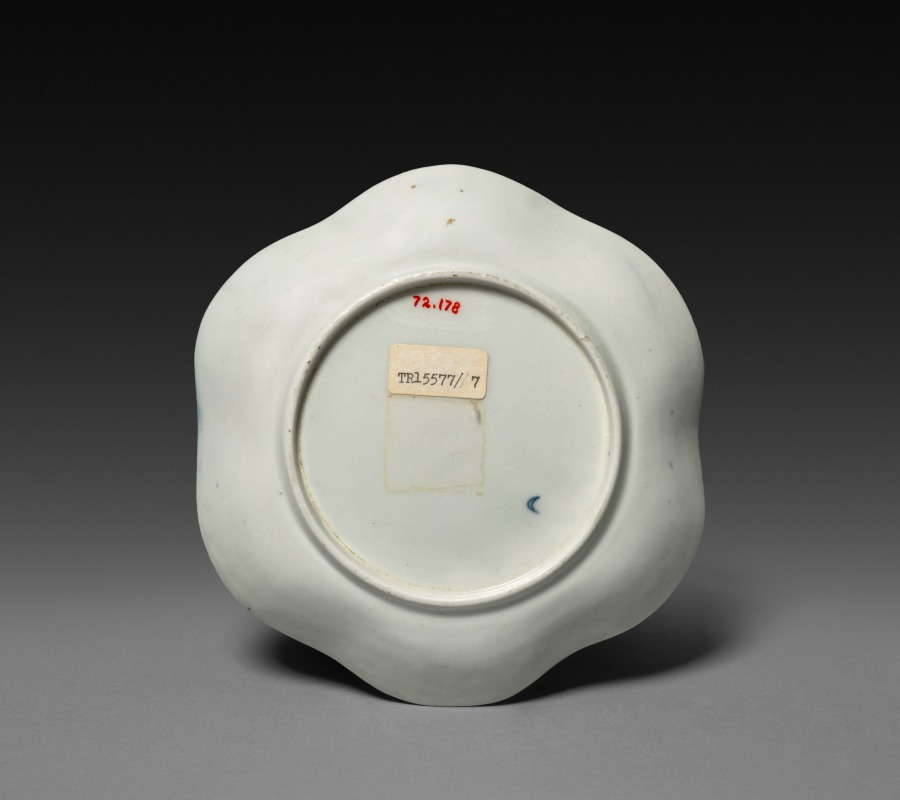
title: Plate with Peony Decoration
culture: England, Worcester, 18th century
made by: Worcester Porcelain Factory (British, established 1751)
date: 1765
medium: soft-paste porcelain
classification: Ceramic